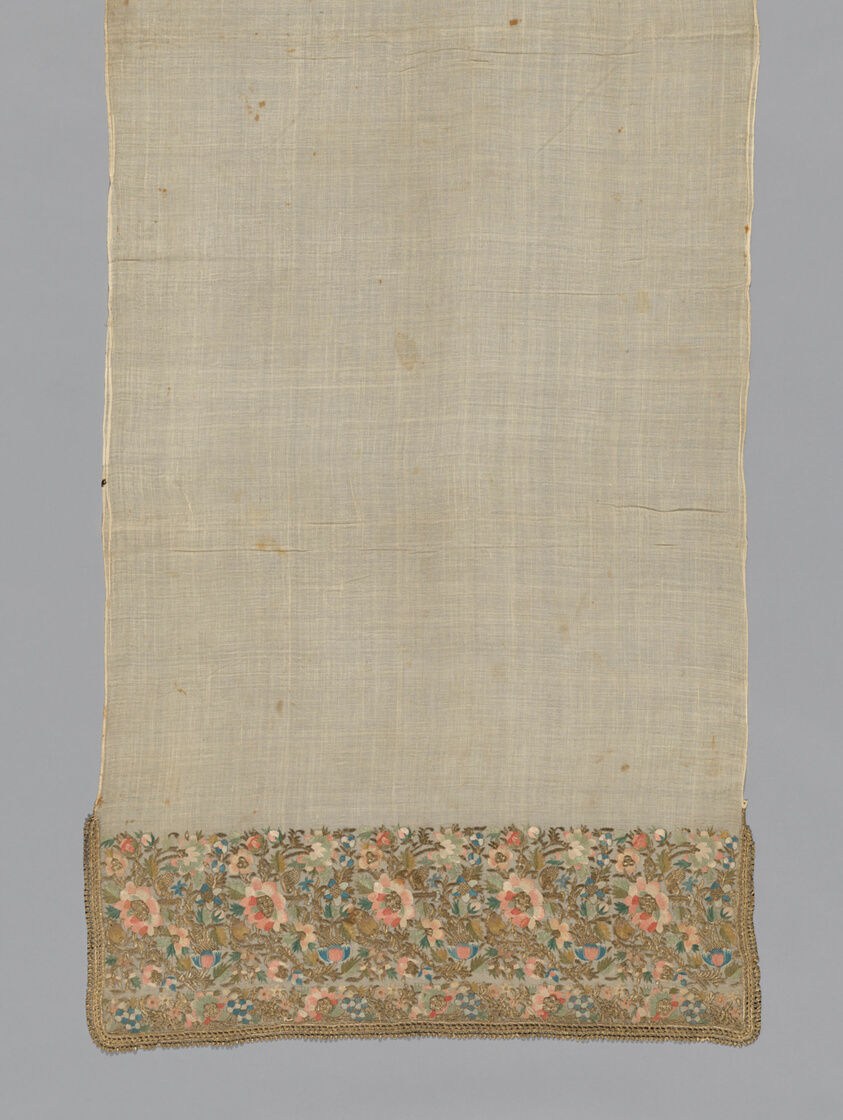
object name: Textile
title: Towel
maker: Turkey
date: 1850/1900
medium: Embroidered borders at each end. Floral patterns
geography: Turkey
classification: textile; needlework (visual works); weaving